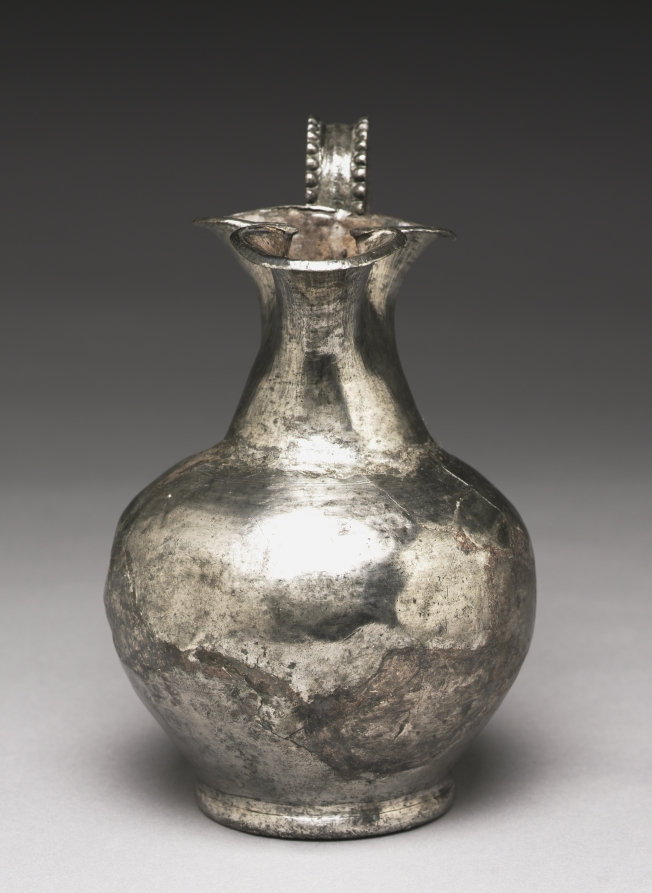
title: Ewer with a Trefoil (Three-Part) Spout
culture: Byzantium, Syria(?), Byzantine period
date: 300–600 CE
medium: silver with niello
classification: Metalwork